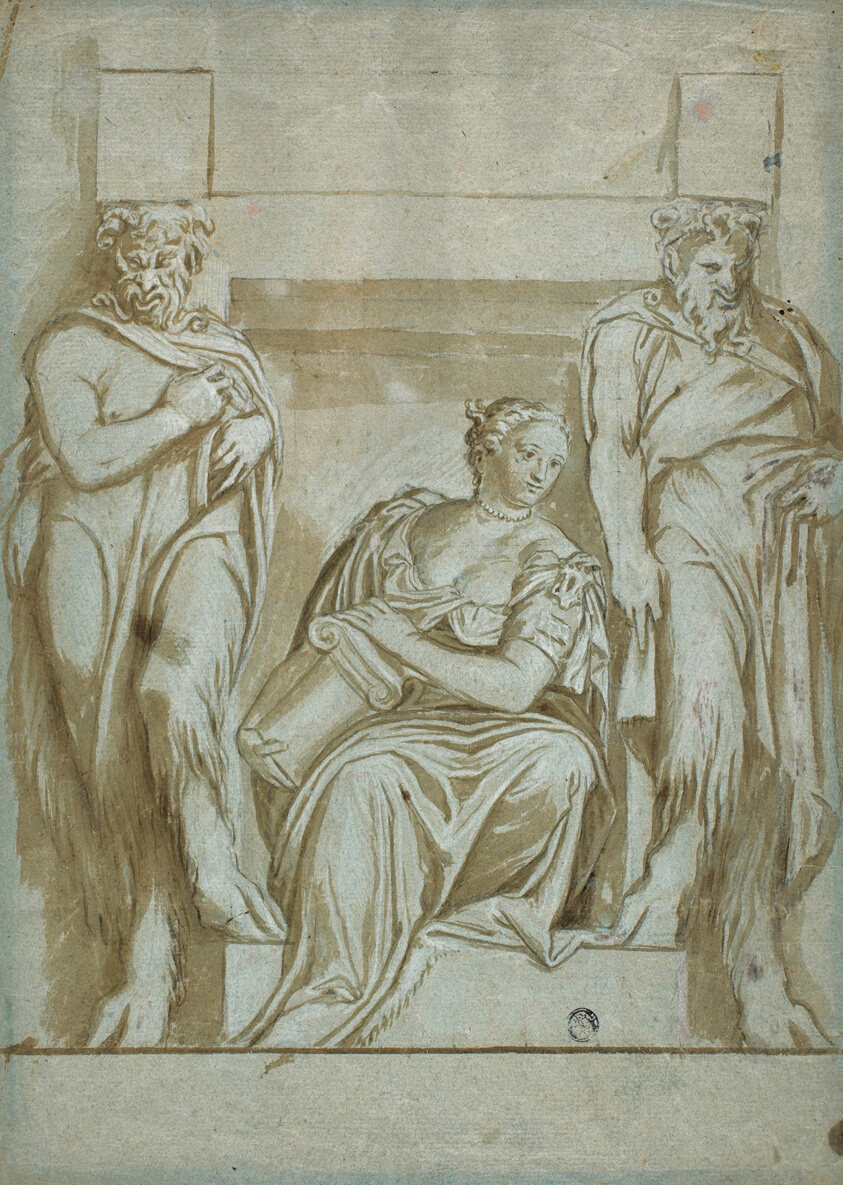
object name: Drawing and Watercolor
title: Fortitude (or Strength) Flanked by Two Satyrs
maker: After Paolo Caliari, called Veronese; Italian, 1528-1588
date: c. 1550-1600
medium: Brush and brown wash, heightened with lead white (partially oxidized), over black chalk, on blue laid paper, squared in black chalk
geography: Italy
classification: wash; drawings (visual works); prints and drawing